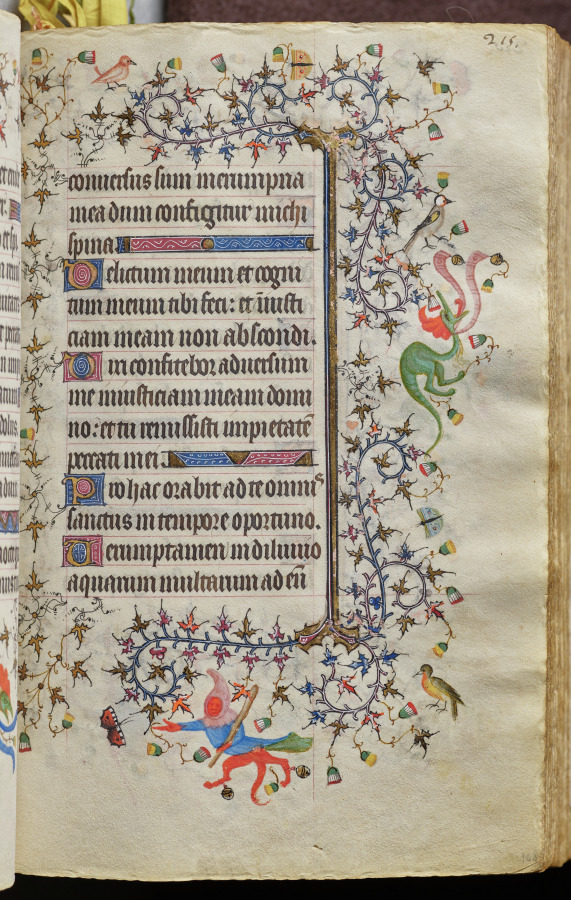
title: Hours of Charles the Noble, King of Navarre (1361-1425): fol. 108r, Text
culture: France, Paris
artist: Master of the Brussels Initials and Associates (French)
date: c. 1405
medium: ink, tempera, and gold on vellum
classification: Bound Volume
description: This precious volume was obviously highly prized by its owner, the French-born King of Navarre, who had his coat of arms painted on no less than twenty folios. Rather than directly commissioning this manuscript from a specific workshop, it seems that Charles the Noble acquired his book of hours -- perhaps ready-made for the luxury market -- while on a trip to Paris in 1404-05. A collaborative effort, six painting styles are evidenced within the pages of this codex, those of two Italians, two Frenchmen, and two Netherlanders. The painter who was responsible for the planning and decoration of the book, and who produced seventeen of the large miniatures, was a Bolognese artist known as the Master of the Brussels Initials. His principal assistant, responsible for most of the borders, was a Florentine who signed his name "Zecho" da Firenze on folio 208 verso.